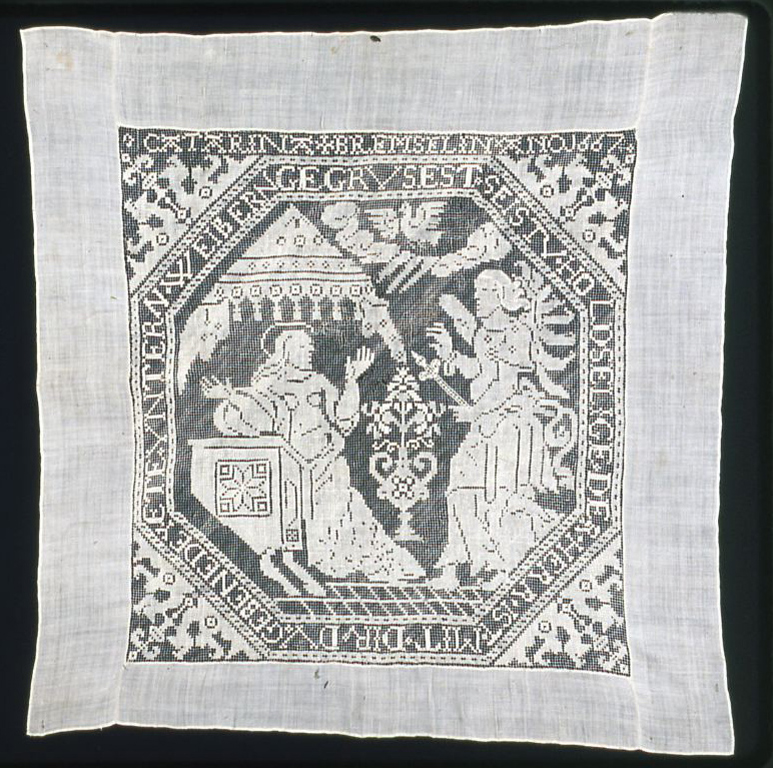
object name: Textile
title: Panel Depicting Annunciation of Virgin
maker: Catarina Bremselin (Germany or Switzerland)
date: 1667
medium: Linen, knotted square netting; embroidered in cloth and darning stitches; edged with plain weave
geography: Germany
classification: textile; needlework (visual works)